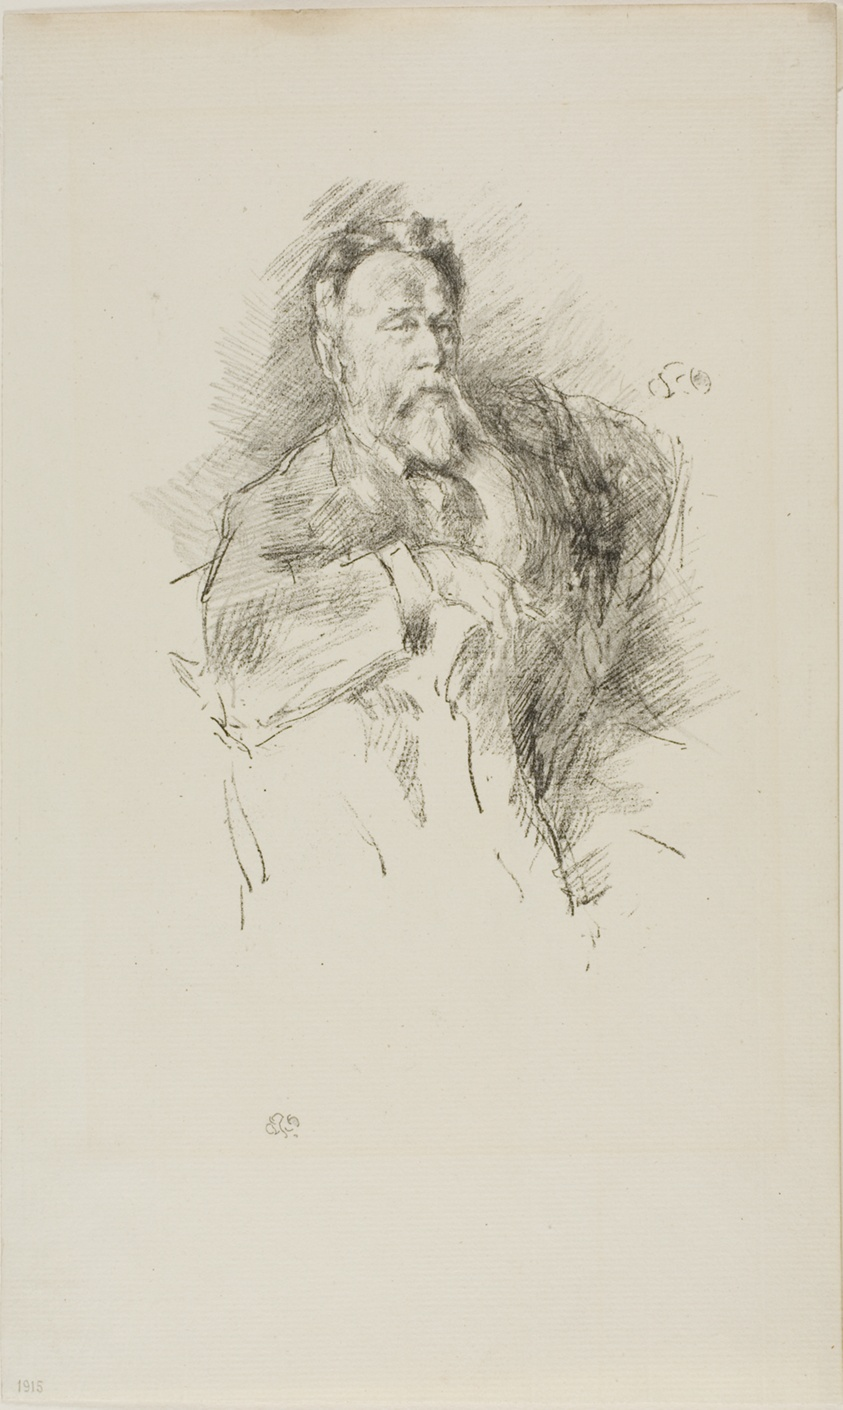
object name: Print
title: Sketch of William E. Henley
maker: James McNeill Whistler (American, 1834-1903)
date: 1896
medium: Transfer lithograph in black with stumping, on ivory laid paper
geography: United States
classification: transfer lithograph; lithograph; print; prints and drawing; paper